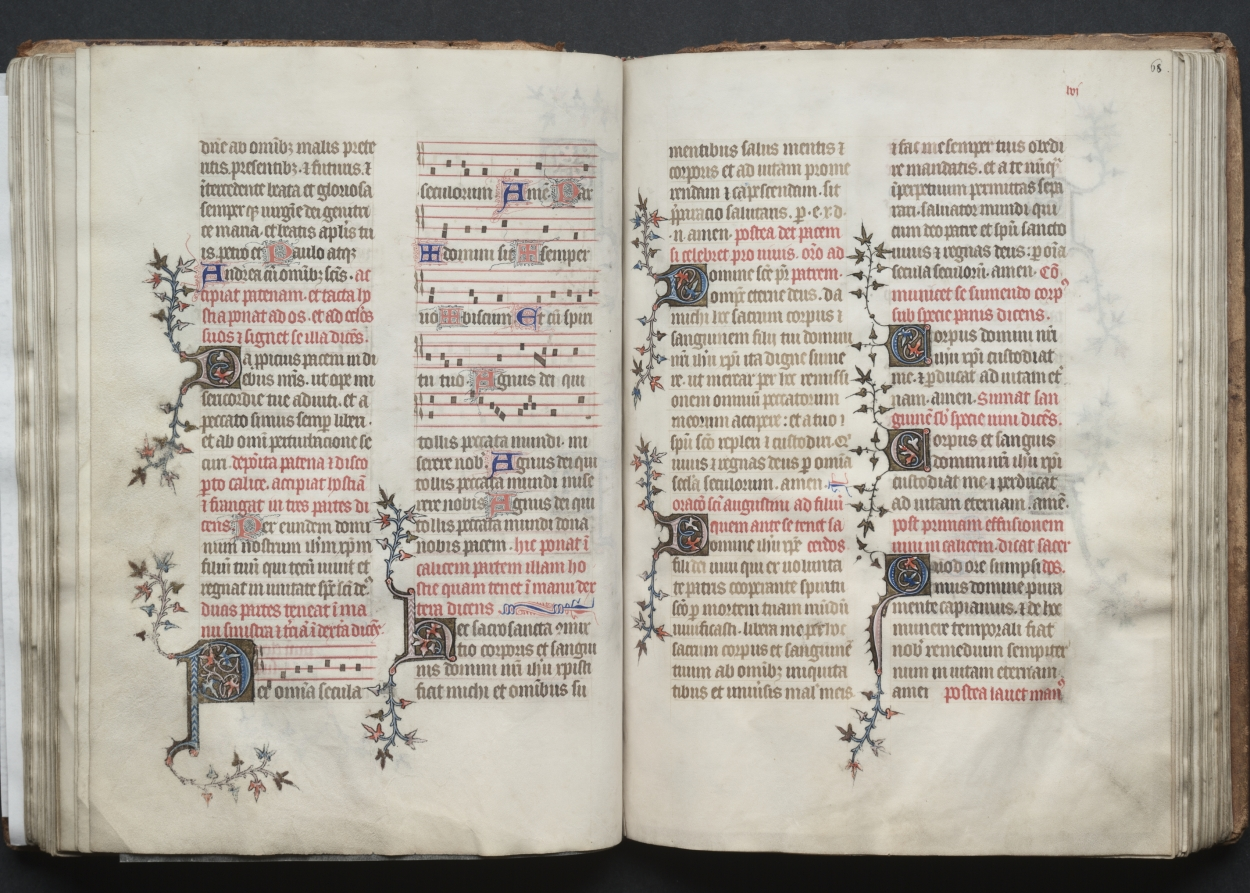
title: The Gotha Missal: Fol. 67v, Text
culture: France, Paris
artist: Master of the Boqueteaux (French)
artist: and Workshop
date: c. 1375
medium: ink, tempera, and gold on vellum; blind-tooled leather binding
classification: Bound Volume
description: The style and quality of this manuscript's decoration is typical of deluxe Parisian books made for aristocratic or royal patrons. Most of the book's decoration appears to be the work of the Master of the Boqueteaux, an artist active at the court of King Charles V (died 1380). His style was apparently shared by a number of book illuminators working in and around Paris. It is very possible that the Gotha Missal belonged to Charles V, but is not provable because the manuscript has no royal portraits and lacks a colophon. Given the book's magnificent decoration, however, it would seem that it was produced for a Valois prince, if not for the king himself. The manuscript receives its name from the German dukes of Gotha, its later owners.